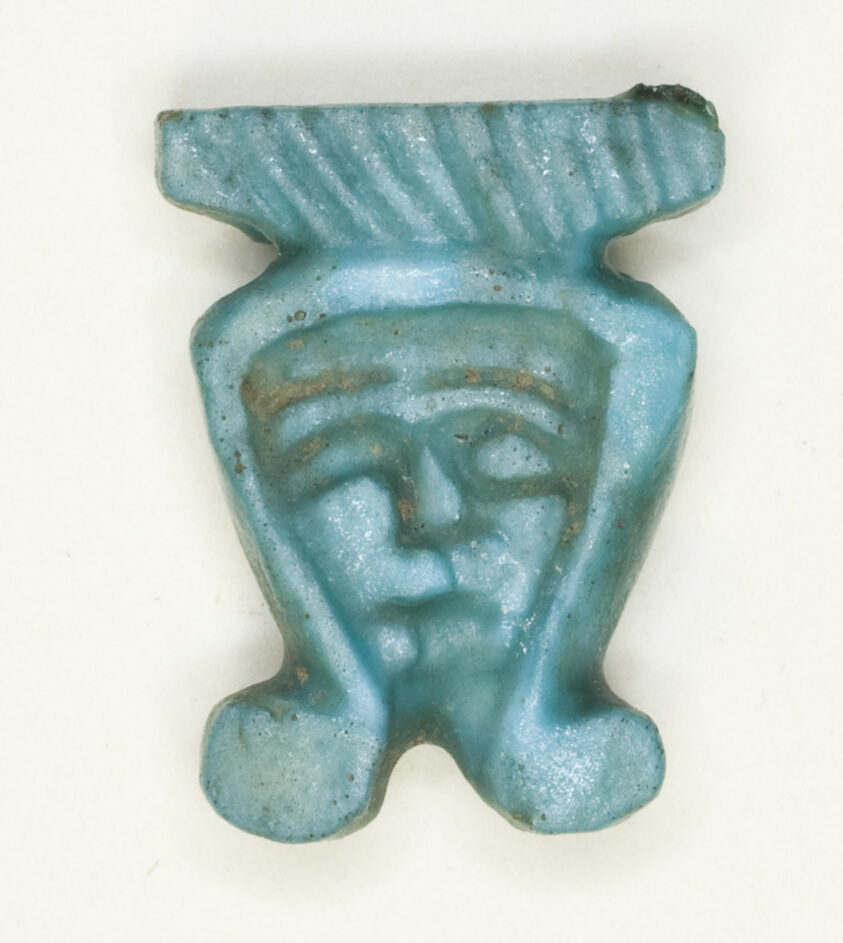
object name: Costume and Accessories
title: Amulet of the Goddess Hathor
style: egyptian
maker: Egyptian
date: New Kingdom–Late Period (about 1550–332 BCE)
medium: Steatite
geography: Egypt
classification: amulet; jewelry; faïence; earthenware; ceramics; ancient art; costume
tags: goddesses